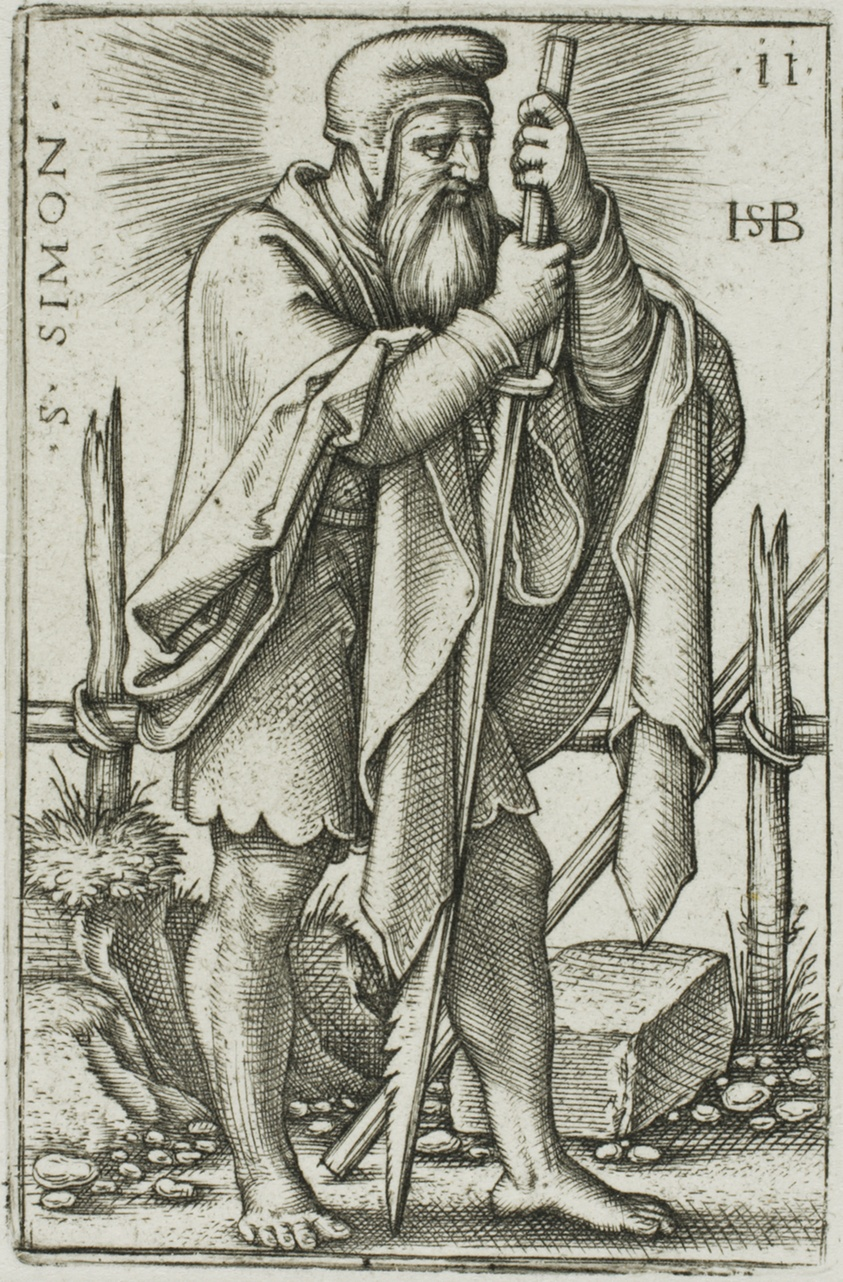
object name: Print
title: St. Simon, plate 11 from The Twelve Apostles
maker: Sebald Beham; German, 1500-1550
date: 1545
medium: Engraving in black on white wove paper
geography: Germany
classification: engraving; print; prints and drawing